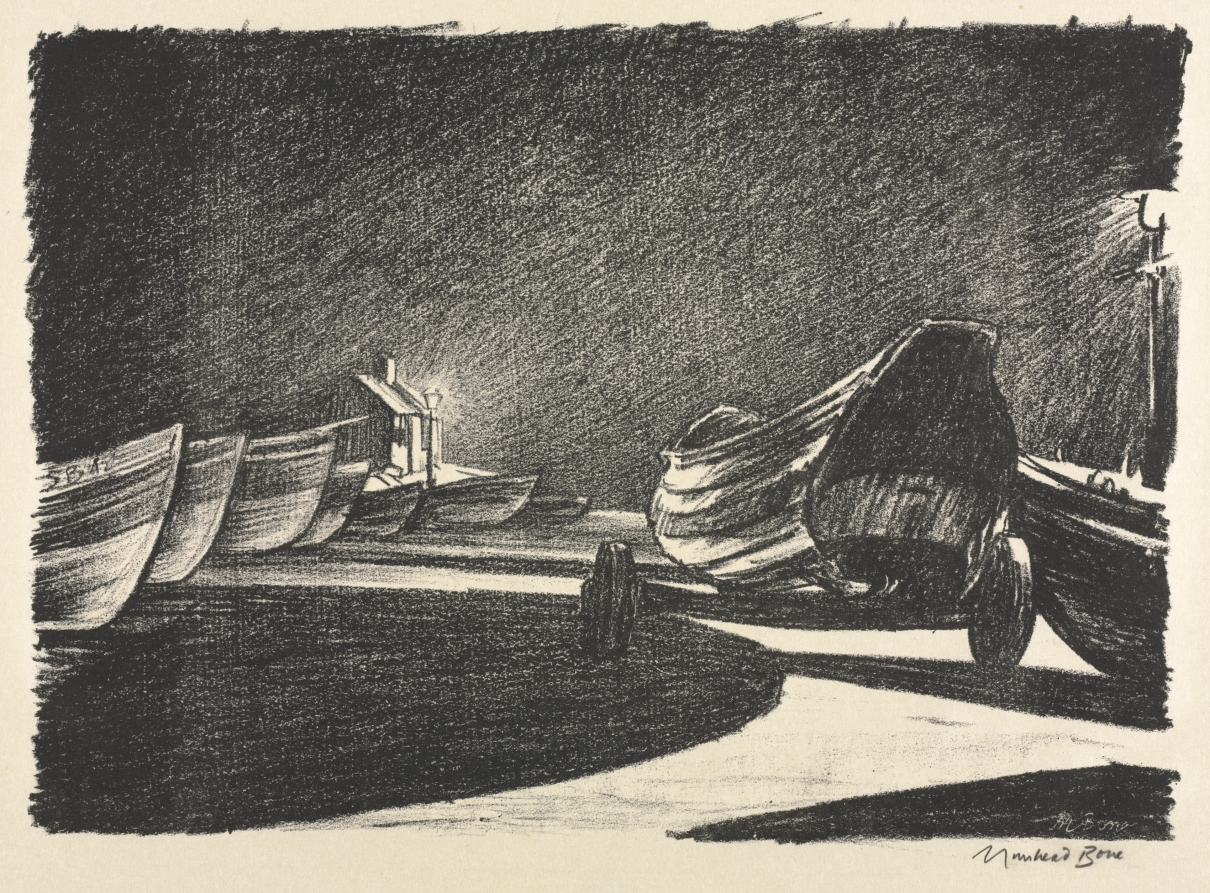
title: Night at Filey, East Riding, Yorkshire, England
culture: England, 20th century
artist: Muirhead Bone (British, 1876–1953)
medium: drypoint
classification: Print